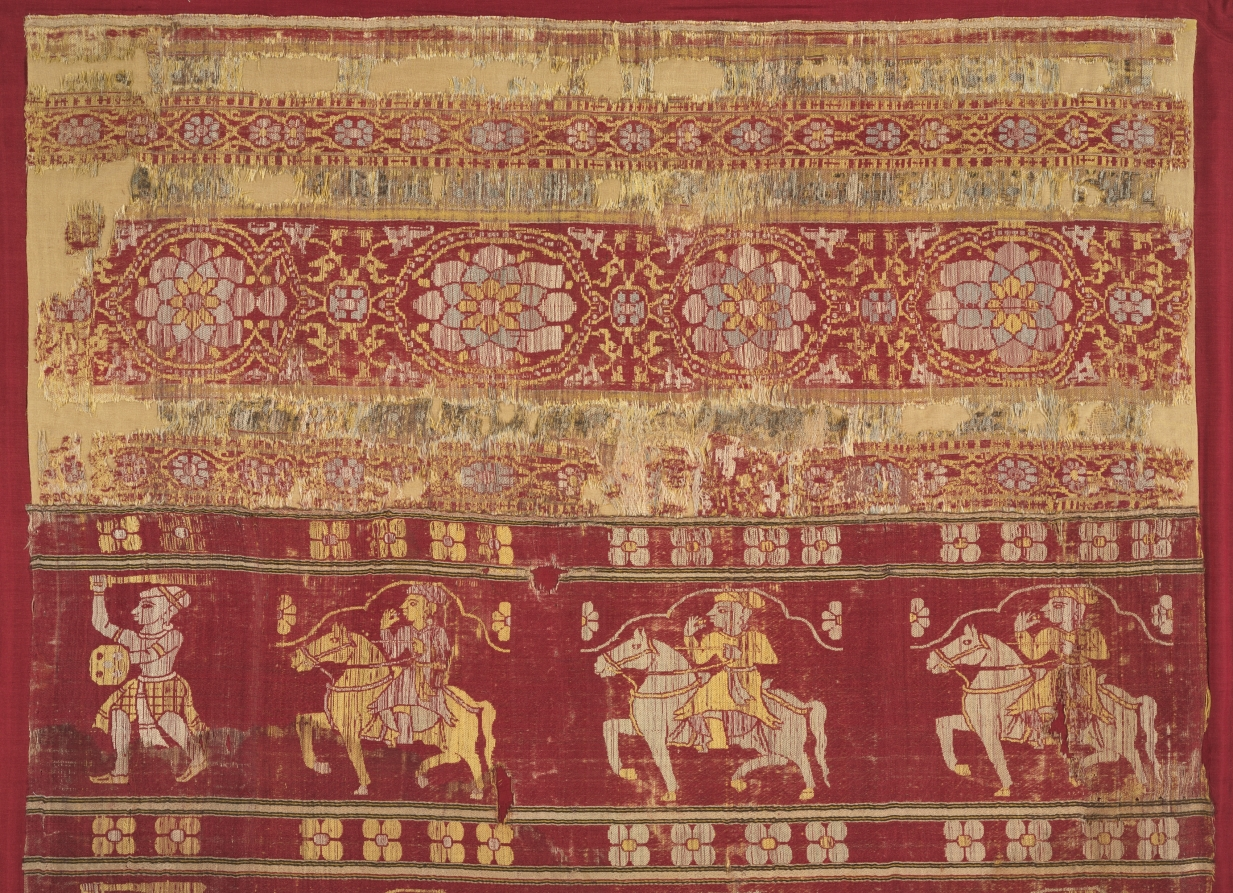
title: Tent Hanging (Part of a Larger Piece)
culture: India, Gujarat, Ahmadabad, 16th-early 17th century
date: 1560–1610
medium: Silk; lampas weave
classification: Textile